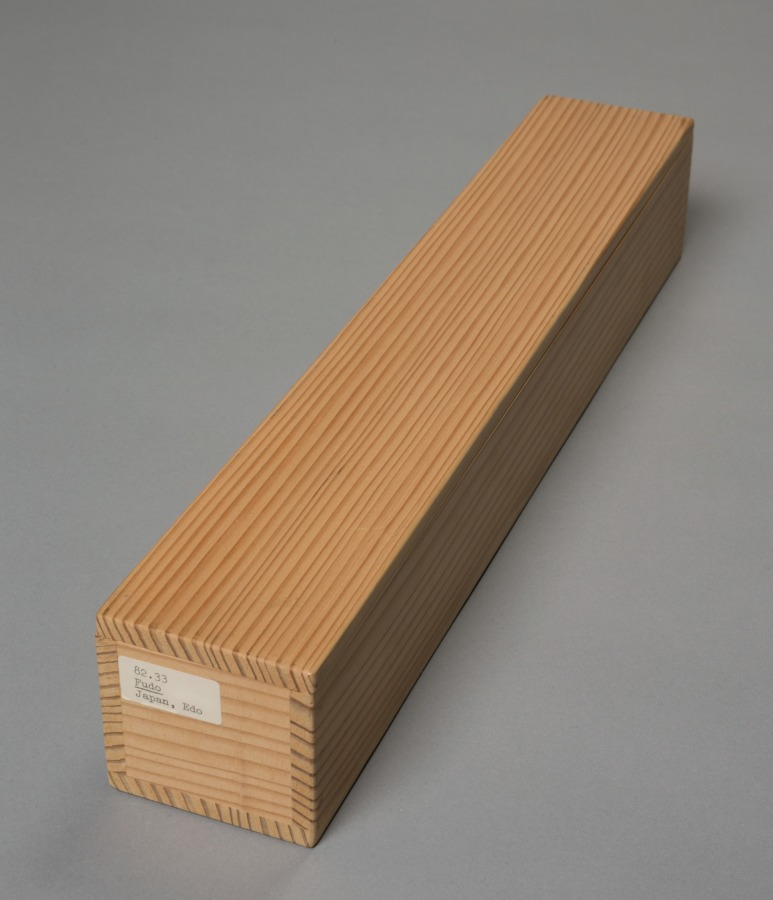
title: Shomen Kongo: The Blue-Faced Kongo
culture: Japan, Edo period (1615–1868)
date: 1615–99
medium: hanging scroll; ink and color on paper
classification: Painting